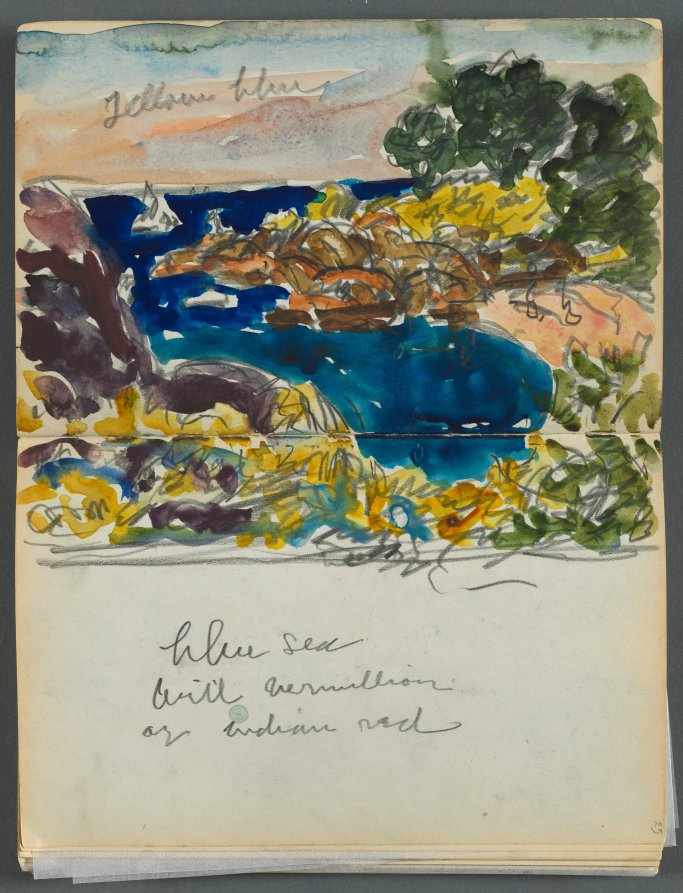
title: Sketchbook- The Granite Shore Hotel, Rockport, page 024 & 25: Harbor View with Color Notations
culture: America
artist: Maurice Prendergast (American, born Newfoundland [now Canada], 1858–1924)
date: 1905–10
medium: graphite and watercolor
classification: Bound Volume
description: This sketchbook contains 72 pages of pencil drawings and 9 watercolors of Cape Ann. On the inside of the cover Prendergast wrote the address of the Granite Shore Hotel in Rockport, Massachusetts.